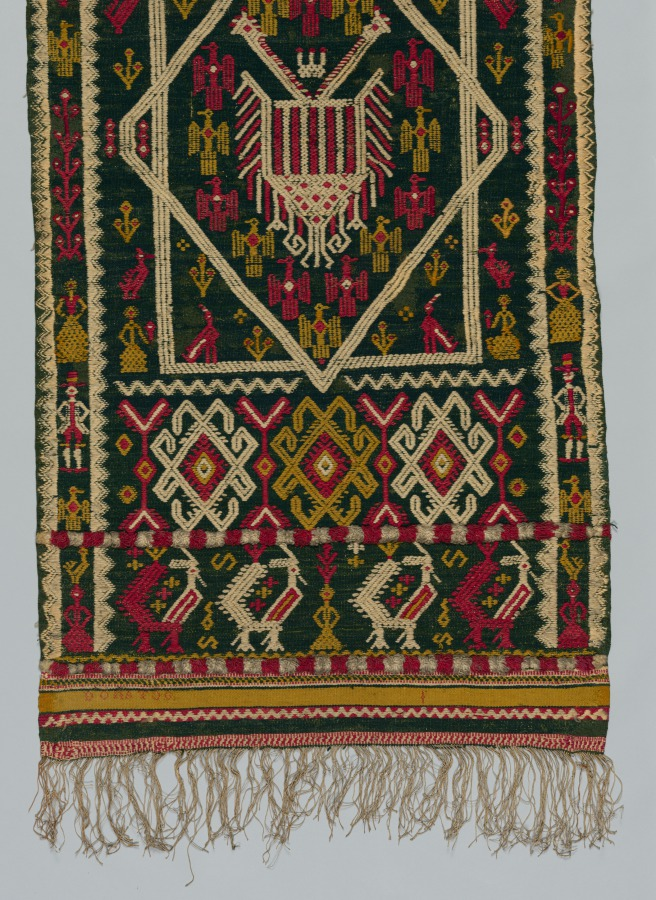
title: Woven Bed or Chest Cover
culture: Italy, Terra di Lavoro, 18th century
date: 1700s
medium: embroidery; wool on linen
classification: Textile